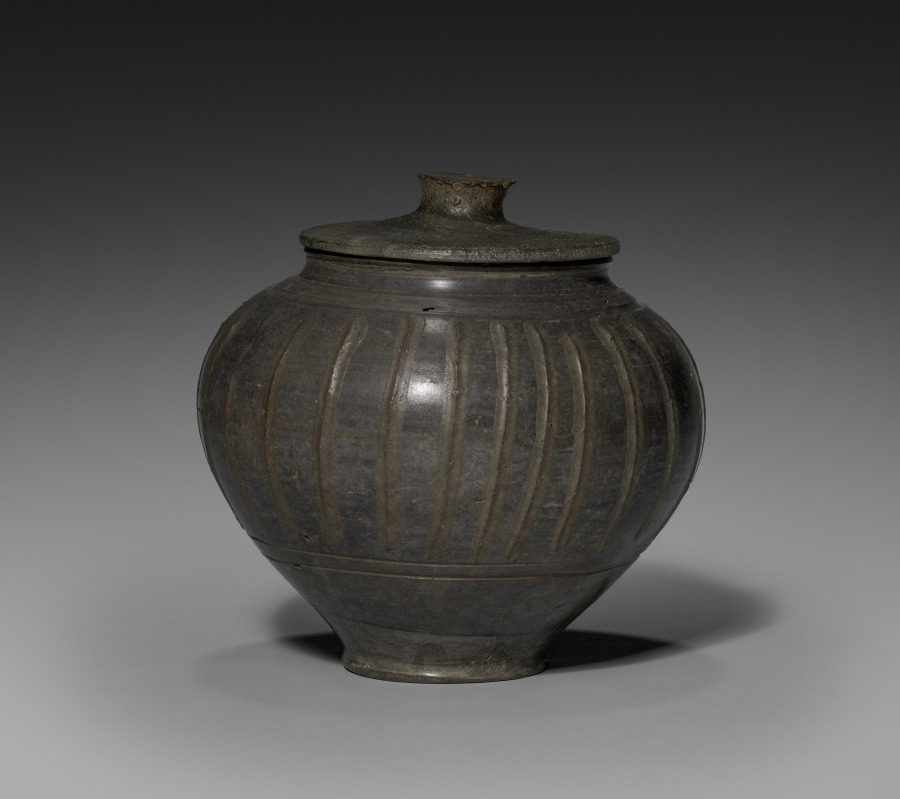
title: Pot with Cover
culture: Rhenish (Cologne), Gallo-Roman, 2nd century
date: 100–200 CE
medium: tan ware with gray and some brown burnished slip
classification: Ceramic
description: This elegant pot with its matching lid was made using a potter’s wheel, evident from the subtle horizontal rings that are visible across the belly of the vessel. The vertical ribs were added after the pot was removed from the wheel, using a thick clay paste. The vessel’s lid suggests that it was used for storage.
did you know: The shiny surface of this pot was made using a technique called burnishing, performed by polishing a surface with a hard, smooth object.